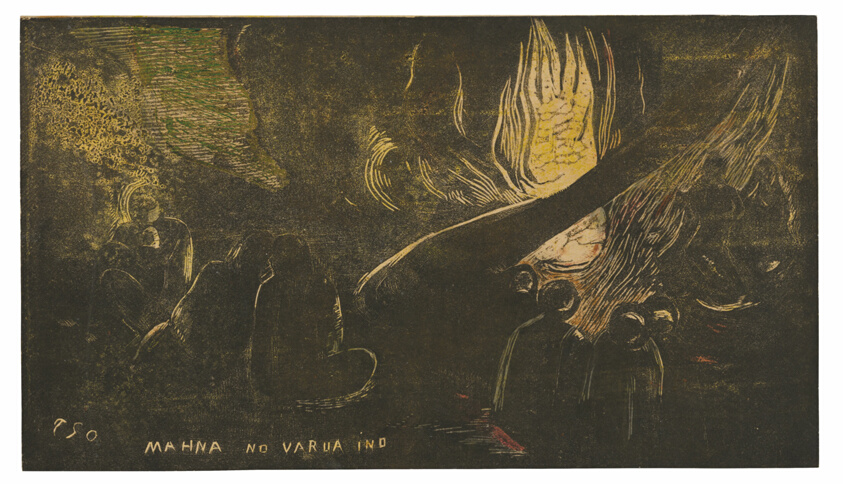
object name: Print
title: Mahna no varua ino (The Devil Speaks), from the Noa Noa Suite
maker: Paul Gauguin (French, 1848-1903)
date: 1893/94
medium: Wood-block print, printed twice in brown and black inks, over a yellow, silver-gray and brownish-orange ink tone block, and transferred yellow, green, red, and orange oil-based media, some containing beeswax and conifer resin (probably pine resin), on ivory Japanese paper, laid down on cream wove card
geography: France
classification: woodcut; print; prints and drawing